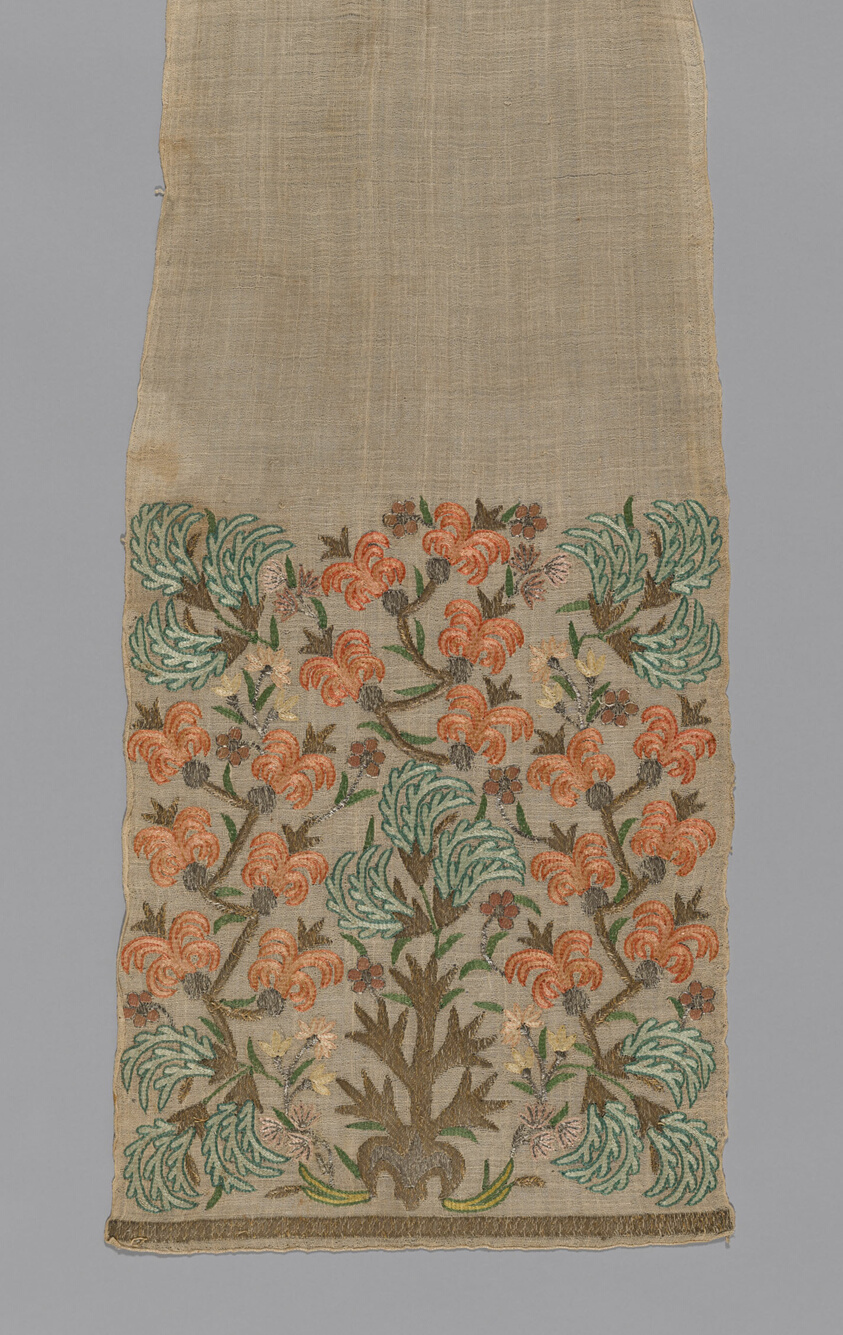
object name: Costume and Accessories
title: Sash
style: turkish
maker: Turkey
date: 19th century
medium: Linen, plain weave; embroidered with gilt-metal-strip-wrapped silk in double running, fishbone, and overcast stitches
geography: Turkey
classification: textile; needlework (visual works); weaving; costume